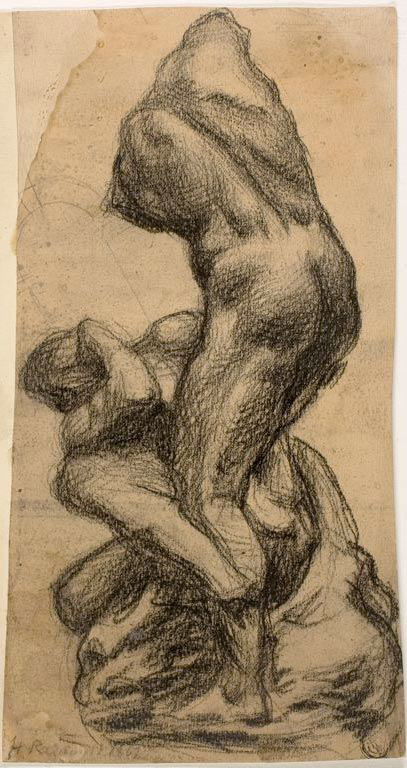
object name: Drawing and Watercolor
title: Two Struggling Figures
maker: Henri Regnault (French, 1843-1871); after Michelangelo Buonarroti (Italian, 1475-1564)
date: 1867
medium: Black crayon on cream wove card, laid down on wove paper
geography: France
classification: crayon; drawings (visual works); prints and drawing